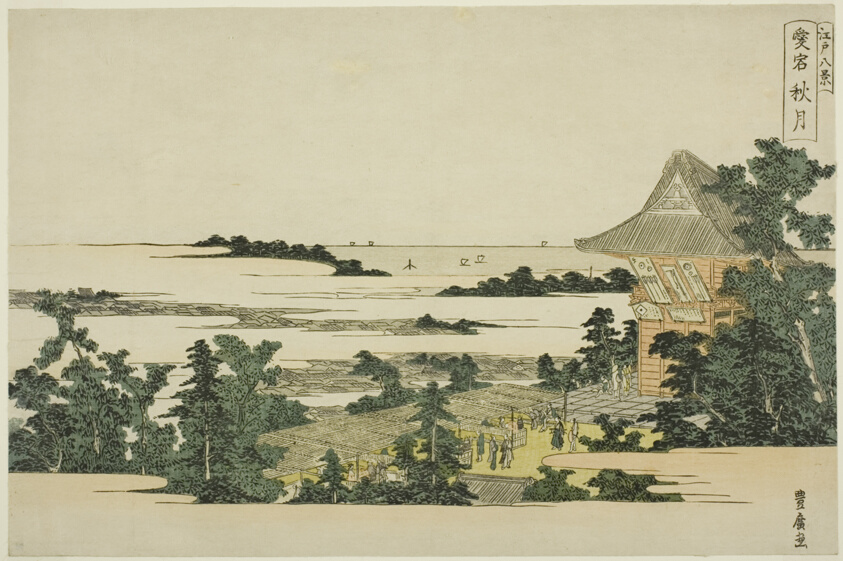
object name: Print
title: Autumn Moon at Atago Hill (Atago shugetsu), from the series "Eight Views of Edo (Edo hakkei)"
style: Japanese (culture or style)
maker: Utagawa Toyohiro (Japanese, 1773-1828)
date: c. 1804/18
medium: Color woodblock print; oban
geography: Japan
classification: woodblock print; print; asian art